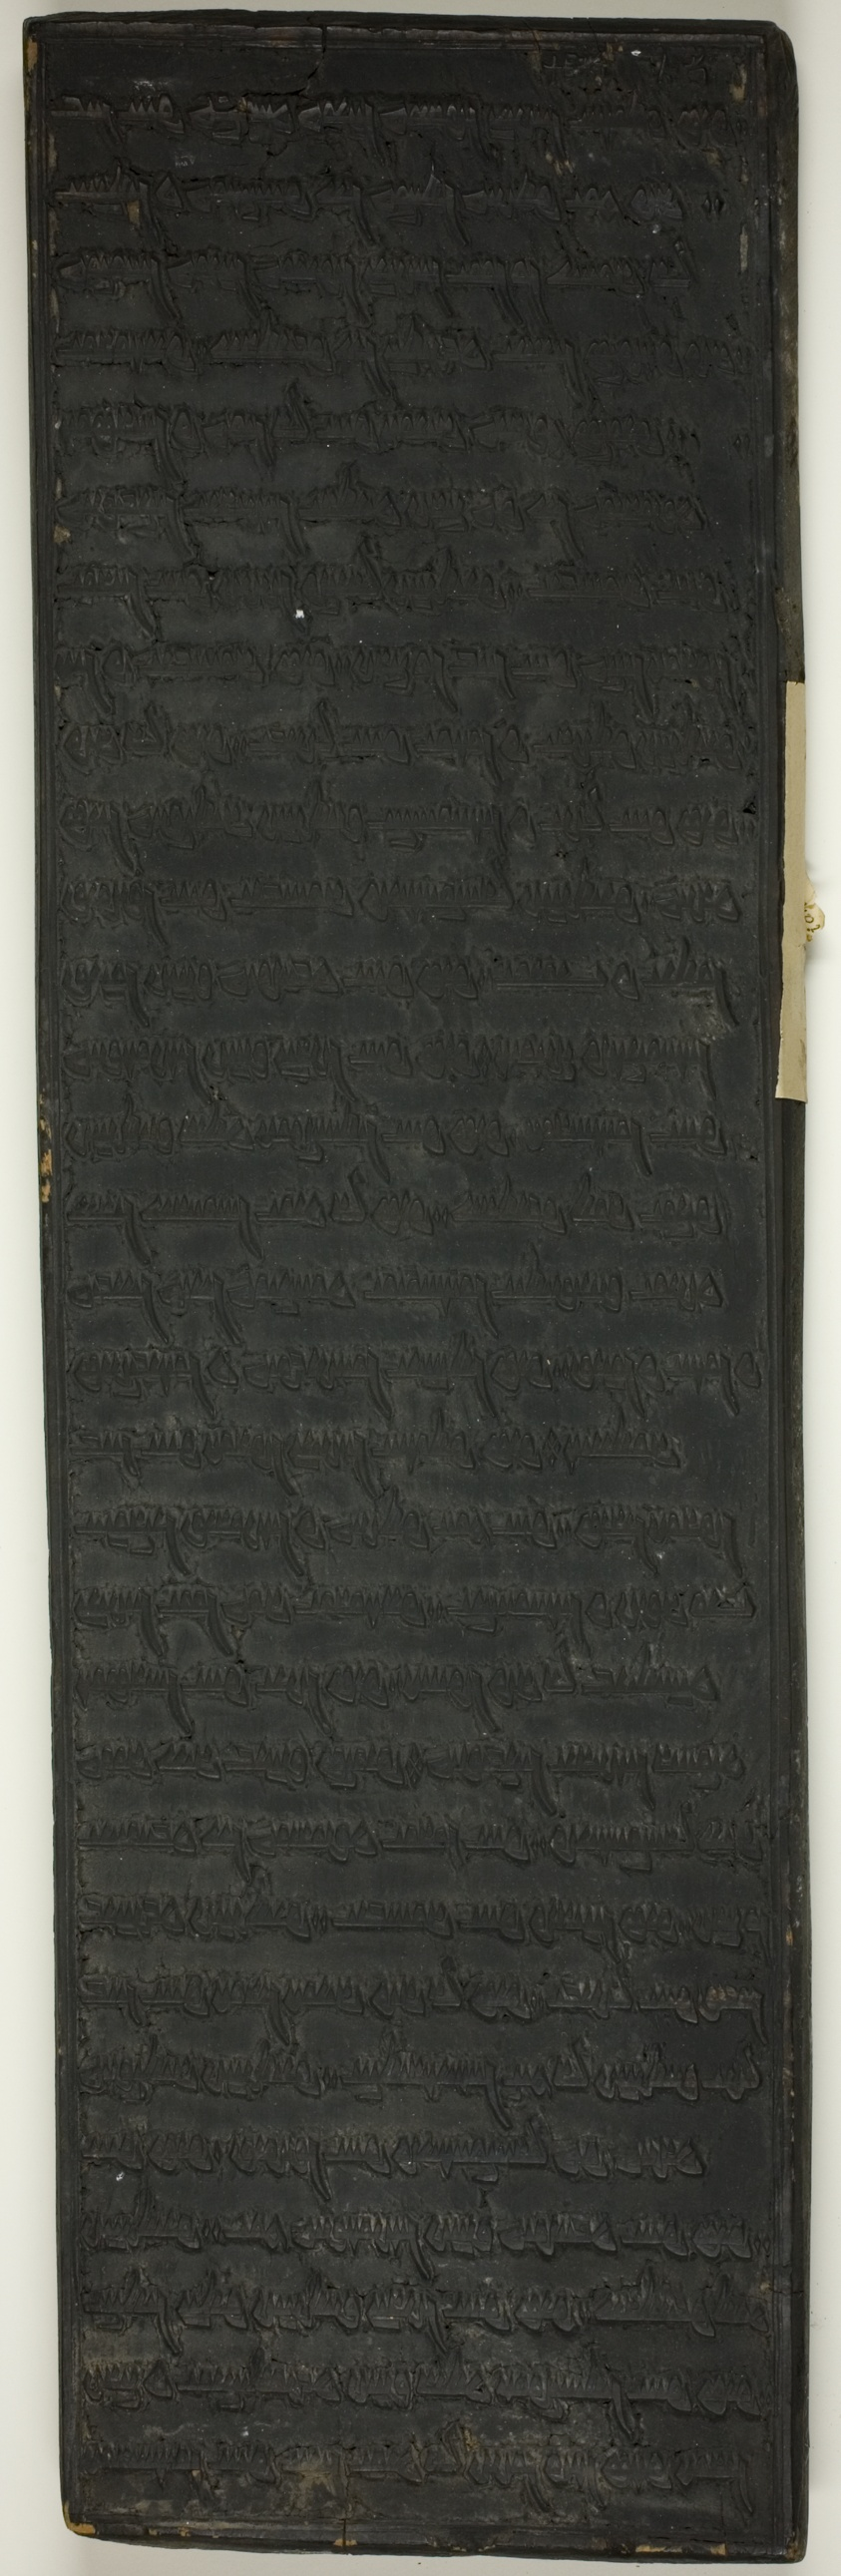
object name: Sculpture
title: Double-Sided Printing Block with Mongolian Script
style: Himalayan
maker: Mongolia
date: 18th/19th century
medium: Woodblock with black ink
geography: Mongolia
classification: woodblock; manuscript; asian art; sculpture